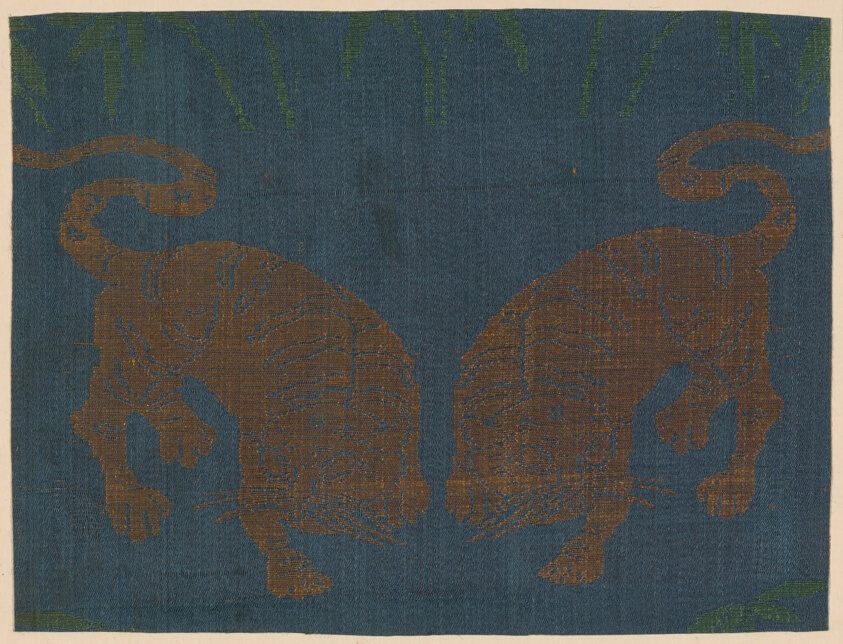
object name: Textile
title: Fragment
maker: Japan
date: Edo period (1615–1868)/Meiji period (1868–1912), 17th/19th century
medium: Plain compound satin, silk.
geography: Japan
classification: textile; weaving